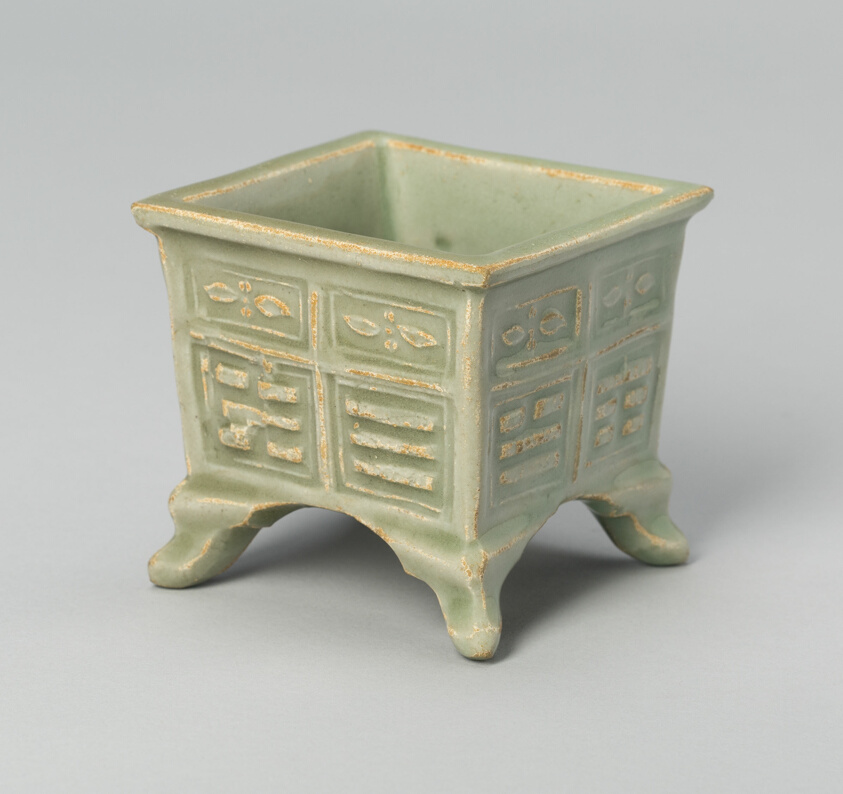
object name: Vessel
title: Square Jar with Archaistic "Trigrams" and Floral Scrolls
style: Chinese (culture or style)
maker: China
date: Yuan (1271–1368) or Ming dynasty (1368–1644), c. 14th/16th century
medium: Longquan-type ware; stoneware with underglaze molded decoration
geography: China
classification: ceramics; vessel